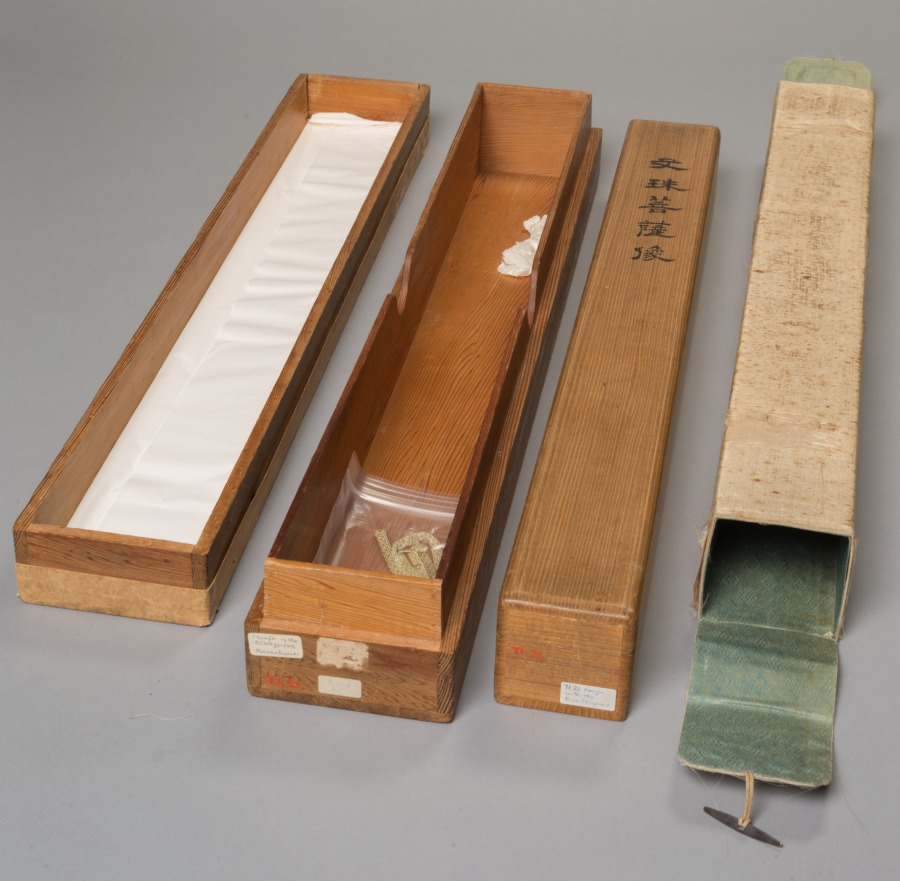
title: Monju with Five Hair Knots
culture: Japan, Kamakura period (1185–1333)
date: late 1200s–early 1300s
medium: Hanging scroll; ink, color, gold, and cut gold on silk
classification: Painting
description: This Buddhist painting shows Monju, Manjushri in Sanskrit, riding a lion. Monju is a bodhisattva, a being who, though enlightened, chooses not to become a Buddha but instead helps others achieve enlightenment. Monju’s youthfulness symbolizes his pure wisdom, unsullied by the world, and his five hair knots represent his vow to keep calamity at bay. The supernatural nature of his lion is emphasized by its hair, every strand painted in gold, as well as by the lotus platforms beneath each of its feet. The boy’s bejeweled body and silk finery is meant to resemble that of an Indian prince.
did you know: This painting is exemplary of the Kamakura period, known for artworks with special attention paid to the realism of images.